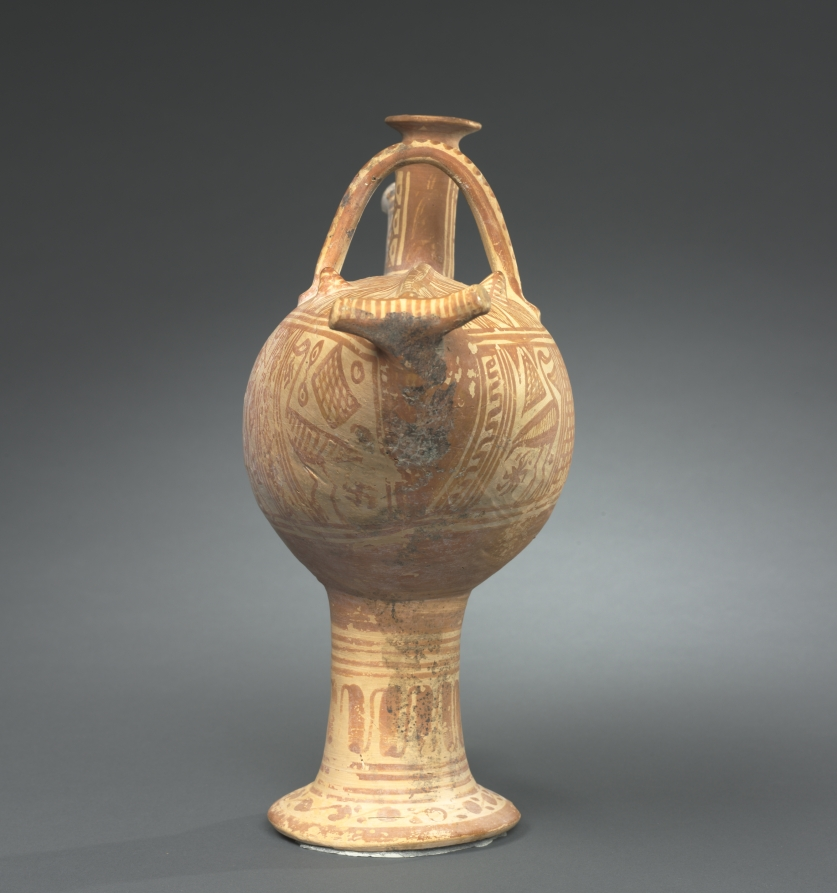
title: Italo-Geometric Bird Askos (Oil Vessel): Hunter (Herakles?) and Stag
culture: Etruscan, likely made at Vulci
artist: attributed to Bisenzio Class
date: c. 700 BCE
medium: ceramic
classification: Ceramic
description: This bird-shaped askos (oil vessel), with a tall filling spout and a pierced beak for pouring, perhaps held perfumed oil for a funerary function. Although the shape likely stems from Italian tradition, the abundantly painted geometric decoration, covering nearly every available surface, derives originally from Greece. Thus scholars have suggested that an immigrant Greek potter working in Etruria may have made the vessel. The sole narrative scene shows a man with a spear leading an antlered animal. If not an anonymous hunter, this could be the earliest known representation of the hero Herakles performing his third labor: capturing the golden-antlered Keryneian hind, or female deer.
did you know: This askos may feature the earliest known representation of Herakles's third labor, the Keryneian hind.